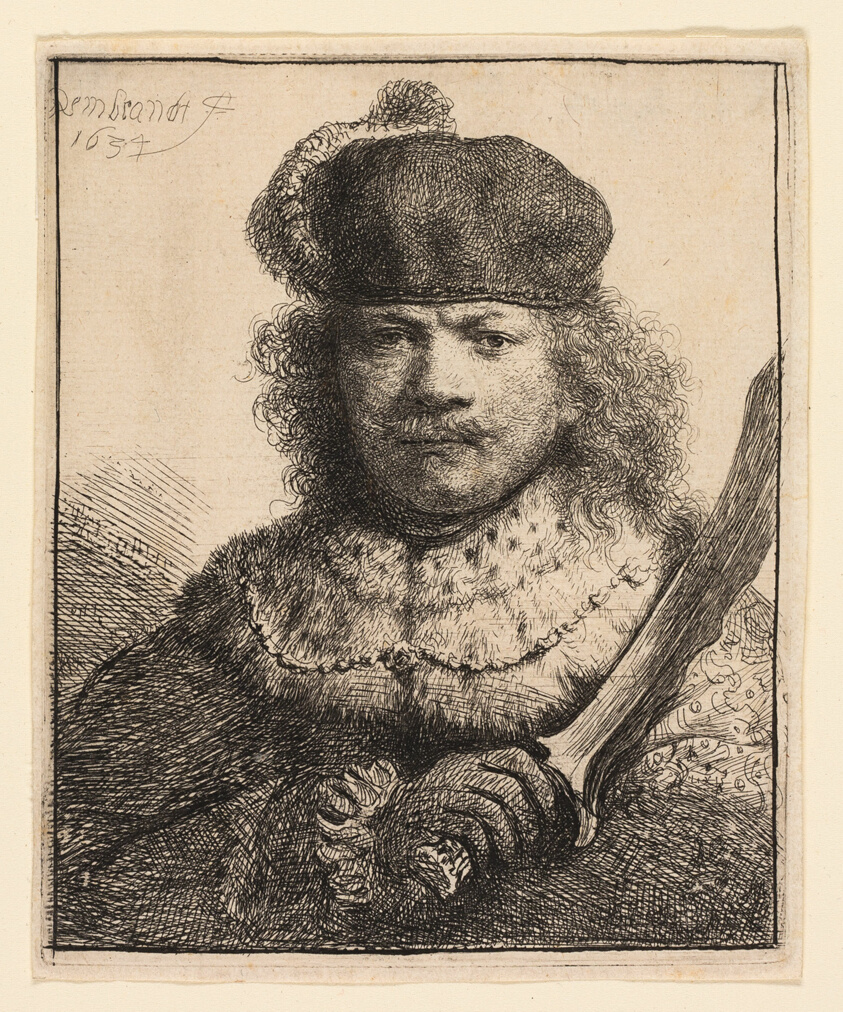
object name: Print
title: Self-Portrait with Raised Sabre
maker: Rembrandt van Rijn (Dutch, 1606-1669)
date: 1634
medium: Etching on ivory laid paper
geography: Holland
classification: etching; print; prints and drawing; paper